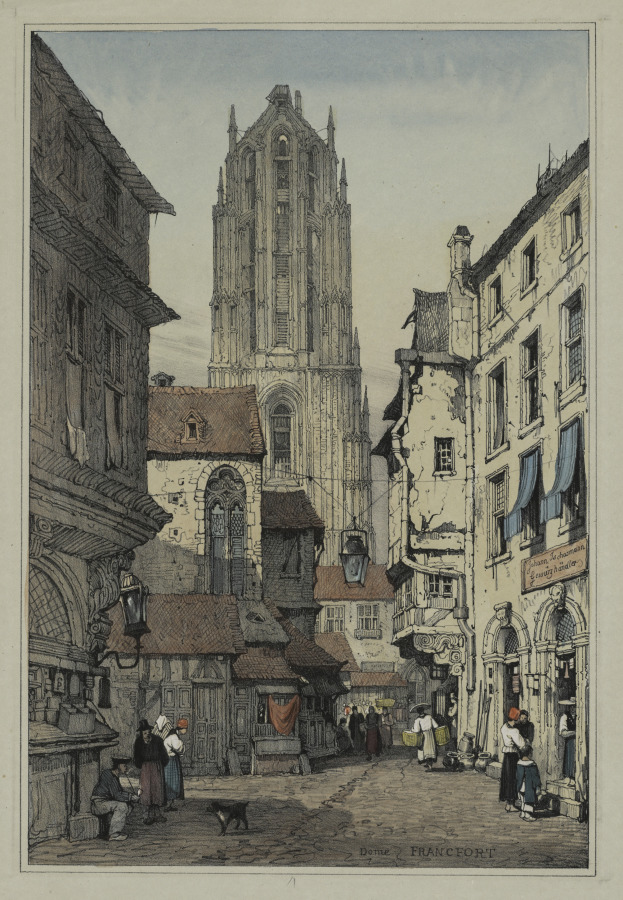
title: Facisimilies of Sketches made in Flanders and Germany: Dome, Francfort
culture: England, 19th century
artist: Samuel Prout (British, 1783–1852)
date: c. 1833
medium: Hand-colored lithograph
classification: Print